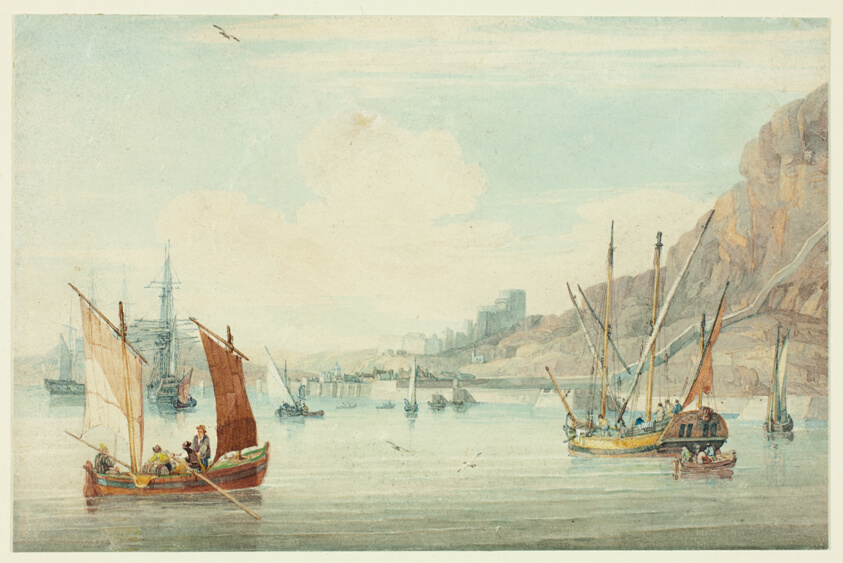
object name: Drawing and Watercolor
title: View on the Tagus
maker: possibly William Havell (English, 1782-1857); or Samuel Owen (English, 1768-1857)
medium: Watercolor on cream wove card, laid down on cream mat board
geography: England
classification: watercolor; drawings (visual works); prints and drawing